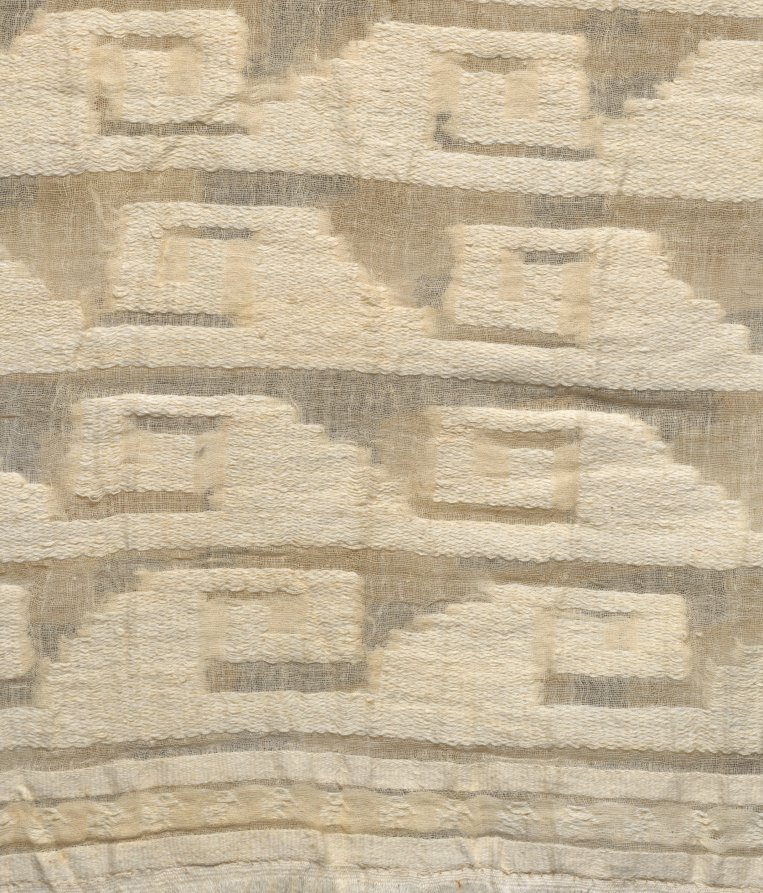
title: Tunic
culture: Peru, Chimú or Chimú-Inka, 12th-16th century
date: 1100–1532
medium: white cotton; plain weave with supplementary weft brocading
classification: Textile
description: This garment embodies an important principle of the Chimú textile aesthetic: a love of combining different textures, some dense and sculptural and others so open and airy they are nearly invisible. (The hand-spun yarns are only .1 to .2 millimeters in diameter.) It also elegantly articulates the simplified, spare visual vocabulary that the Chimú favored, here geometric motifs.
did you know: The Chimú forged an empire that thrived until the 1460s, when the Inka incorporated it into their own imperial domain.